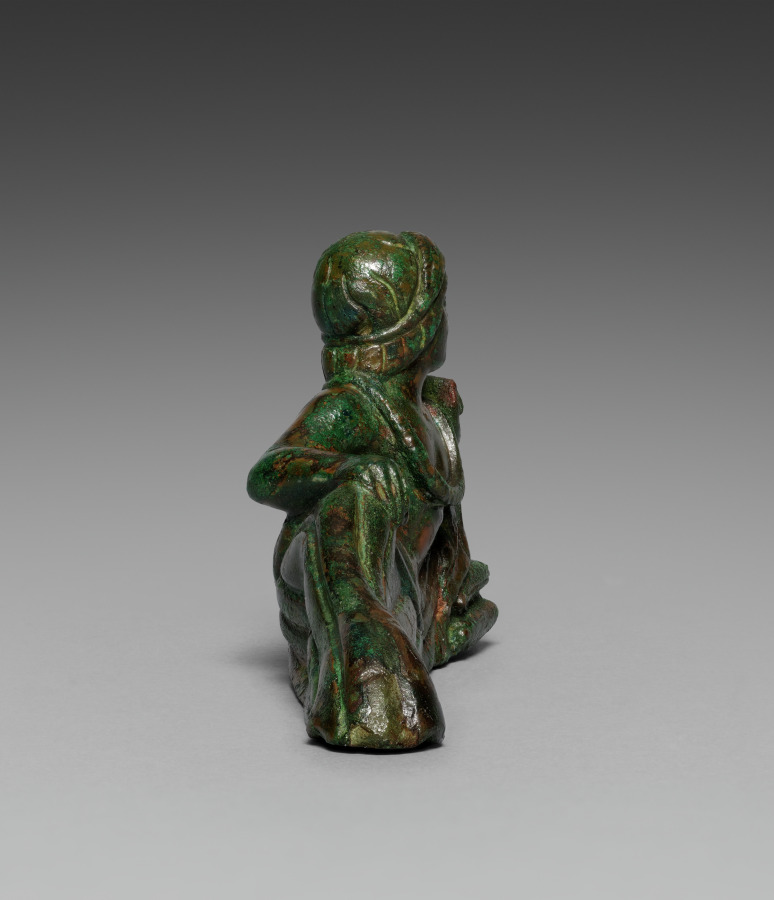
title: Vessel Ornament of Banqueter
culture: Etruscan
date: probably 400–375 BCE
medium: bronze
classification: Sculpture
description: This bronze banqueter figurine was one of six once adorning the rim of a large basin, now lost. Cast in molds with individualized details, most have grooves on their underside to attach to the basin. Minute traces of gilding remain on areas of clothing and skin (mostly visible only under magnification), suggesting that they may have been completely gilded. Two handles in the form of hippocampi, horses with serpentine tails, also belonged to the basin and are now displayed at the Michael C. Carlos Museum at Emory University. The basin may have been used to hold liquid for a banquet, or was perhaps funerary. This banqueter tilts his head toward his left hand, which may have once held an object, now lost. His right arm rests on his hip. Unlike the other banqueters, this figurine does not have exposed feet and his body curves slightly when viewed from above. This suggests that this figurine may have been made for a different initial use before being added to this set.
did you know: The Etruscan banquet shared similarities with the Greek symposium where guests reclined and drank wine.